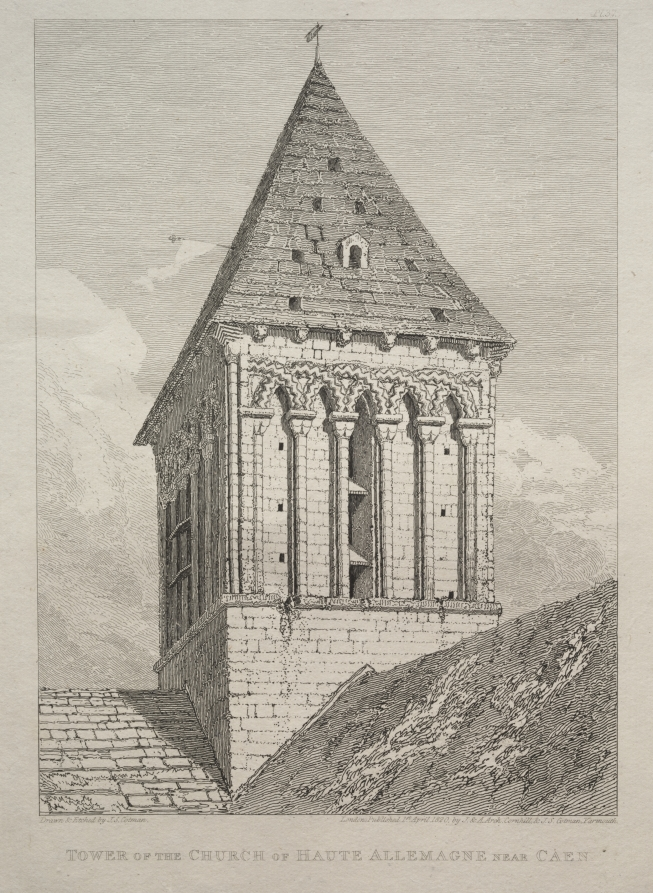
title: Tower of the Church of Haute Allemagne near Caen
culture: England, 19th century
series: Architectural Antiquities of Normandy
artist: John Sell Cotman (British, 1782–1842)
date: 1822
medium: etching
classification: Print